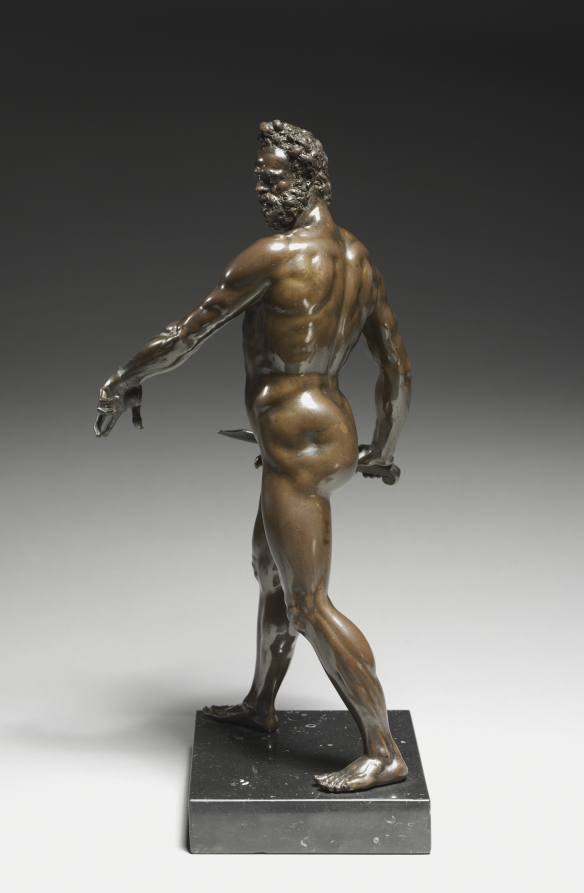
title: Mars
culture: Italy, 16th century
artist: Giambologna (Flemish, active Italy, 1529–1608)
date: c. 1584–87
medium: bronze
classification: Sculpture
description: Although he is lacking the helmet and armor common to Mars in Roman iconography, this figure is identified as the ancient god of war. Mars pauses mid-stride, swinging his sword arm back to strike an enemy in his gaze; this dynamic composition is typical of Giambologna’s models. Collectors prized small bronzes such as this and often kept them in special rooms along with antiquities, coins, shells, and other curiosities. Easy to hold and arrange due to their small size, they were appreciated through touch as well as sight.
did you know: The active, twisting pose indicates that the statue was designed to be viewed in the round.